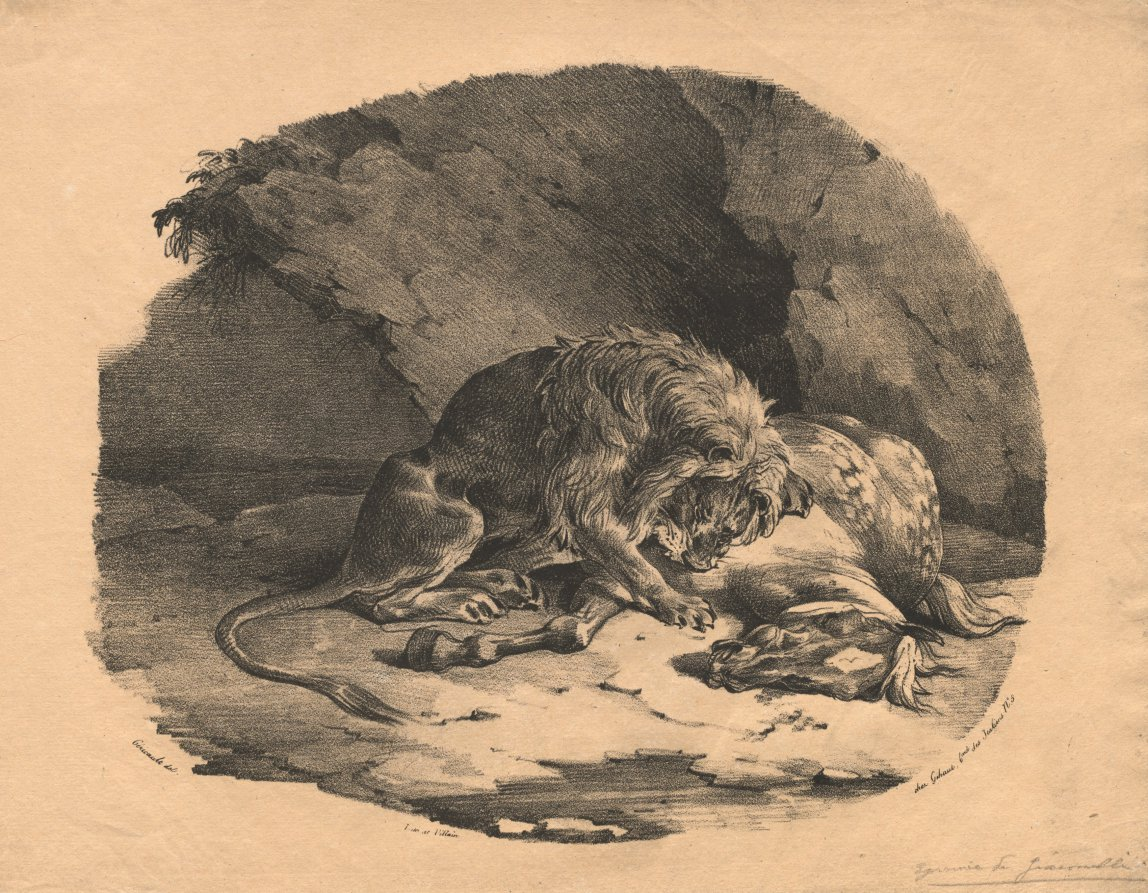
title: Horse Devoured by a Lion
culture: France, 19th century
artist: Théodore Géricault (French, 1791–1824)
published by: Gihaut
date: 1823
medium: lithograph on chine collé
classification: Print